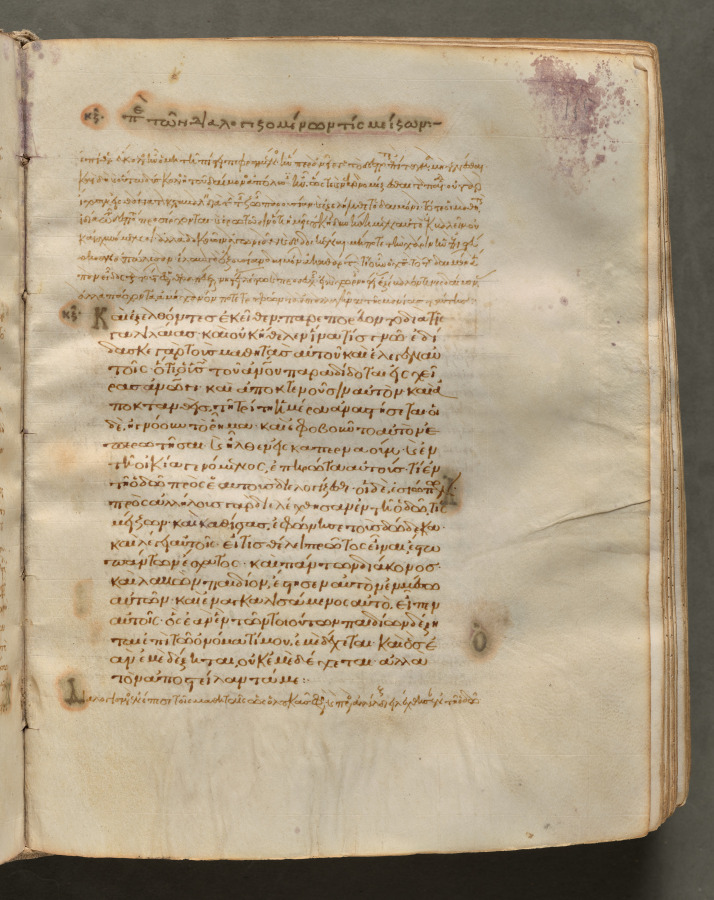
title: Text, folio 165 (recto), from a Gospel Book with Commentaries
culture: Byzantium, Constantinople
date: c. 1000–1100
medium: ink, tempera, and gold on vellum; leather binding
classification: Bound Volume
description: Each of the four gospels in this book opens on a page with brilliantly illuminated borders depicting the author of the text as well as birds-principally peacocks, symbols of the immortality of the soul-and fountains, representing the fountain of life and the salvation of the soul. This volume consists of 428 leaves with texts in Greek. Its level of sophistication suggests that it was probably written and decorated in a monastery in Constantinople.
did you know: Gospel Books were carried in procession through Byzantine churches.